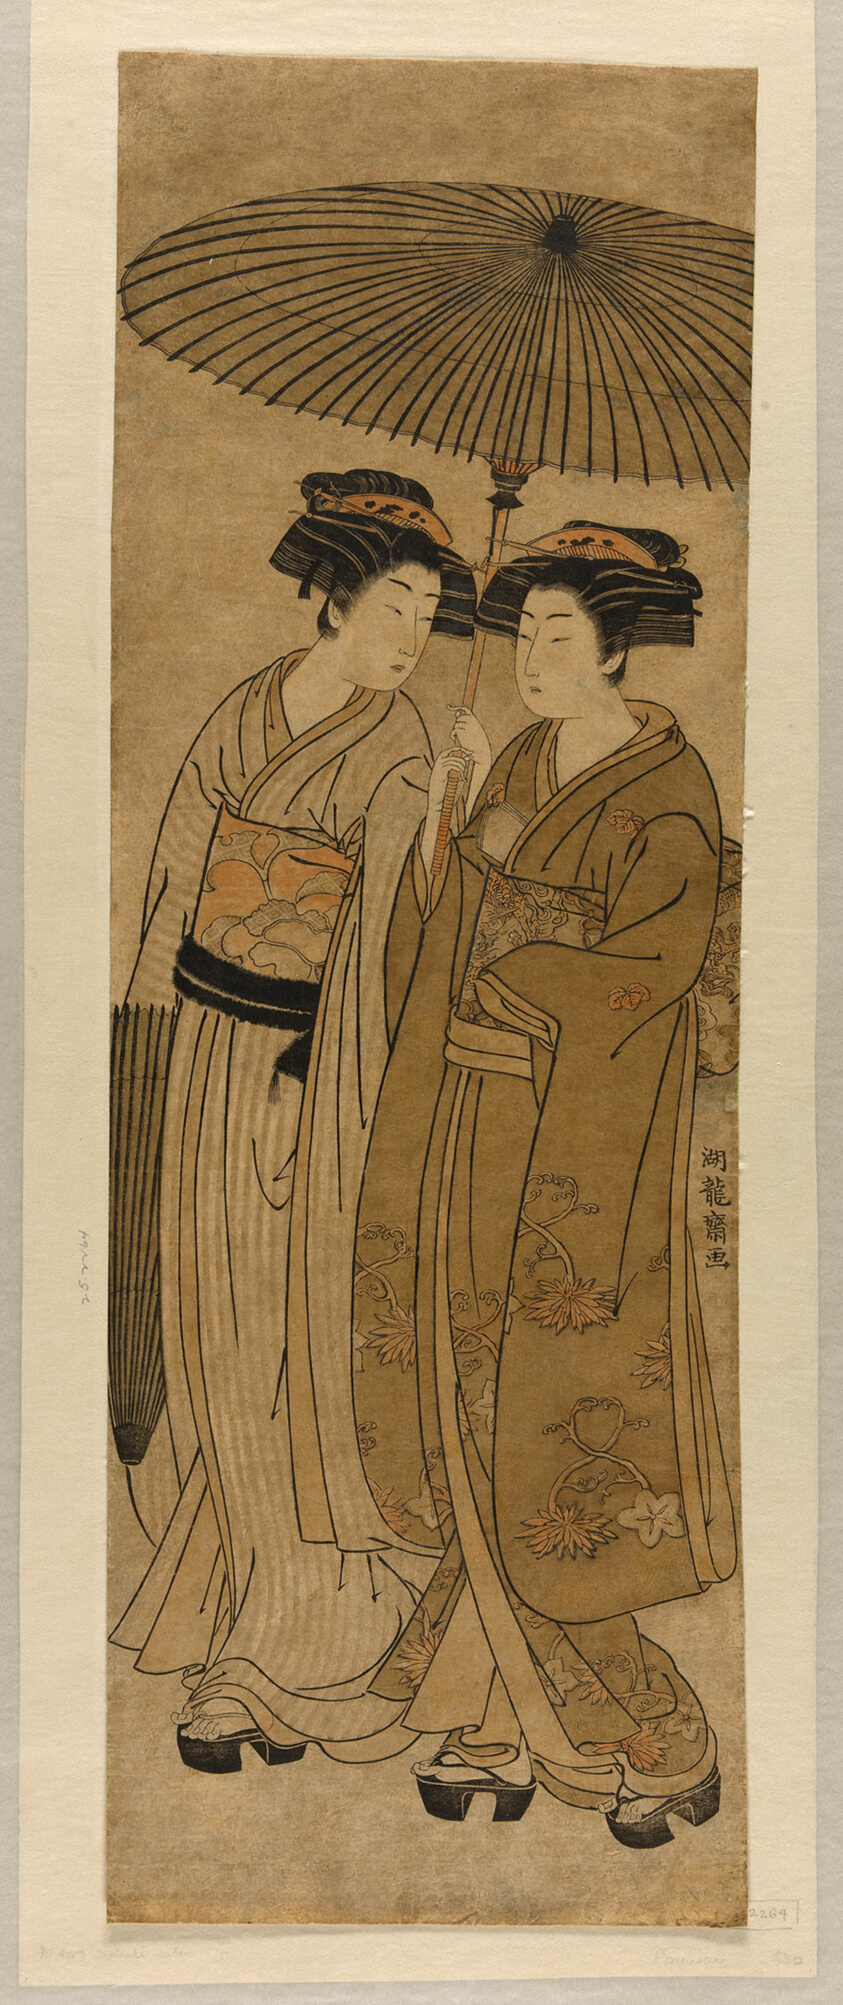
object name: Print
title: Two Young Women Walking Under an Umbrella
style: Japanese (culture or style)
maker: Isoda Koryusai (Japanese, 1735-1790)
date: c. 1777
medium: Color woodblock print; vertical oban diptych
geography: Japan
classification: woodblock print; print; asian art